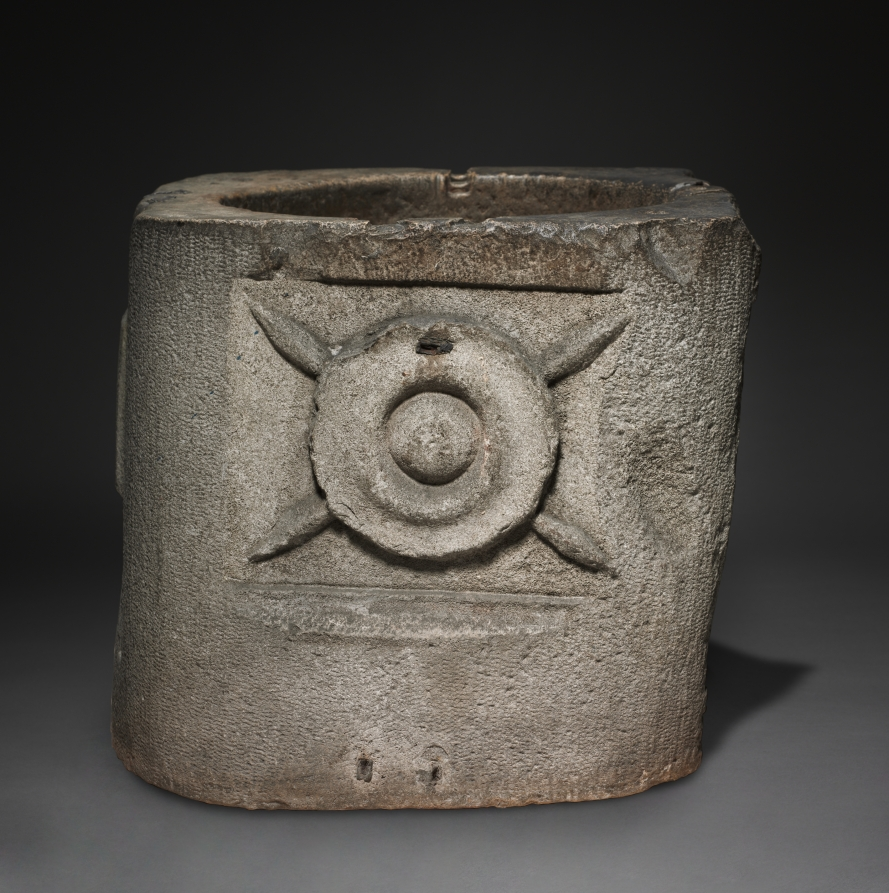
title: Well Head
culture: Lombardic, Italy, Venice(?), Migration period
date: 700s-800s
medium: limestone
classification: Sculpture